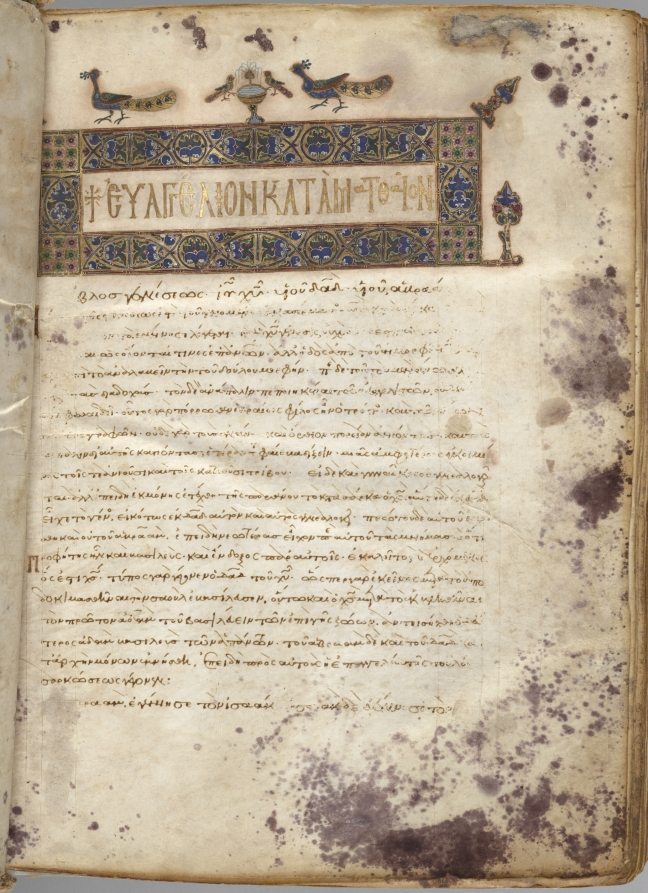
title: Portrait of Matthew, folio 6 (recto), from a Gospel Book with Commentaries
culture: Byzantium, Constantinople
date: c. 1000–1100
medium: ink, tempera, and gold on vellum; leather binding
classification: Bound Volume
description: Each of the four gospels in this book opens on a page with brilliantly illuminated borders depicting the author of the text as well as birds-principally peacocks, symbols of the immortality of the soul-and fountains, representing the fountain of life and the salvation of the soul. This volume consists of 428 leaves with texts in Greek. Its level of sophistication suggests that it was probably written and decorated in a monastery in Constantinople.